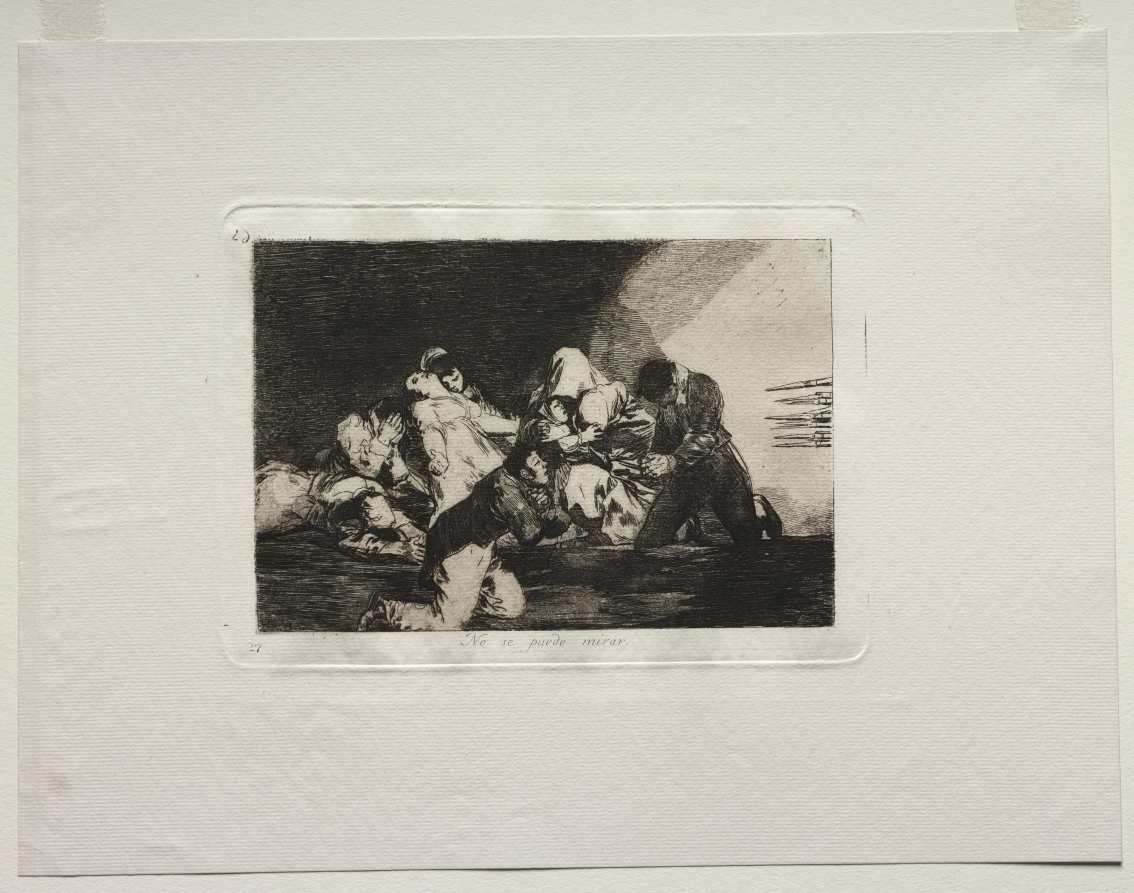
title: The Horrors of War: One Can't Look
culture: Spain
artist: Francisco de Goya (Spanish, 1746–1828)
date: 1810–20, published 1863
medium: etching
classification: Print